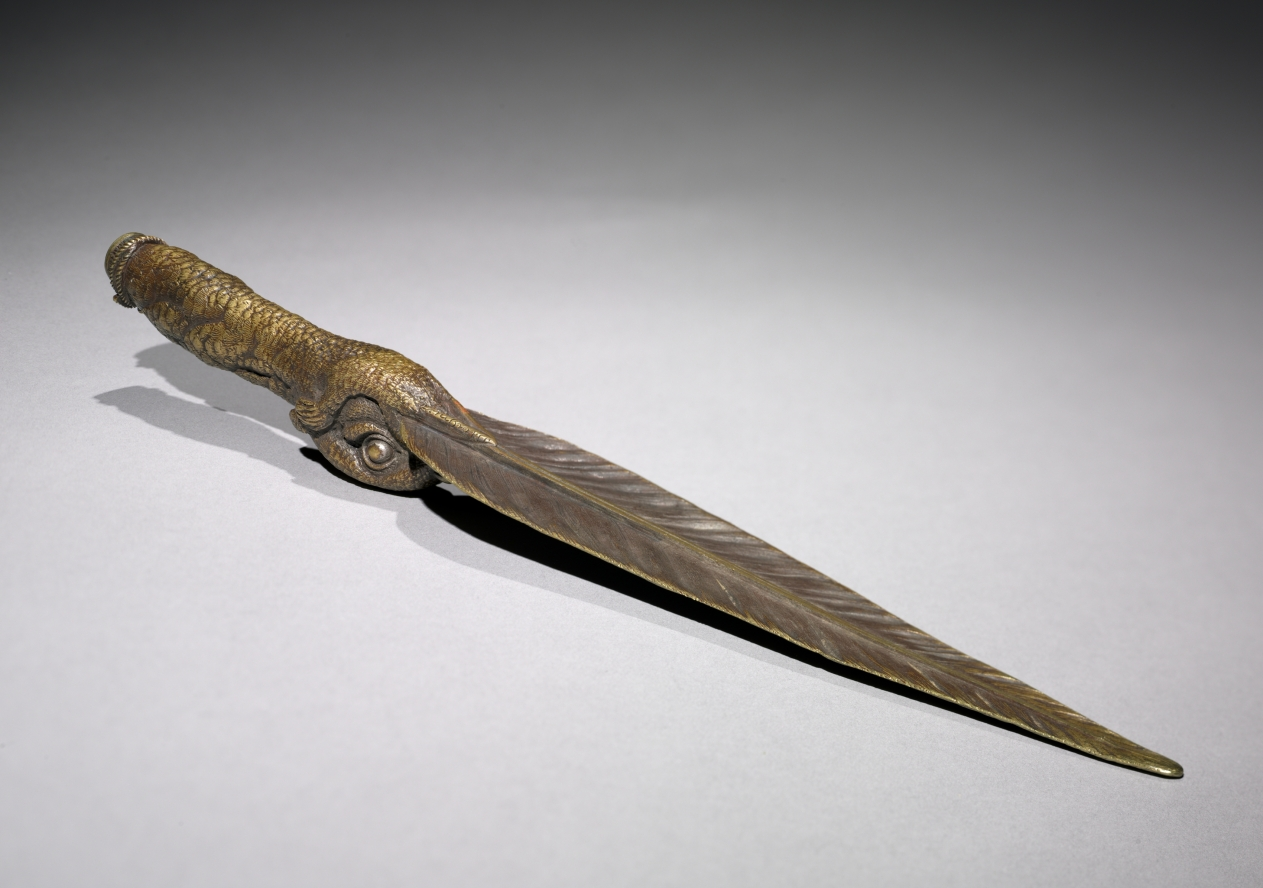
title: Paper Knife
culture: France, 19th century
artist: Jules Pierre Moigniez (French, 1835–1894)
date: 1800s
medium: bronze, golden brown patina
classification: Metalwork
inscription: inscribed on lower bill of bird, in ligature: "J MOIGN[IEZ?]."